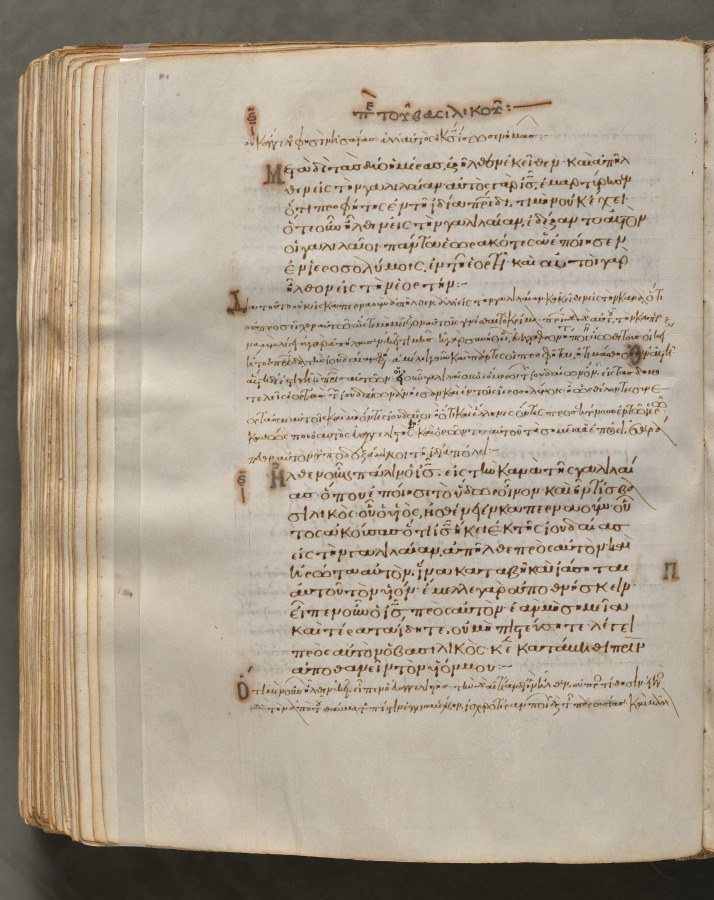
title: Text, folio 341 (verso), from a Gospel Book with Commentaries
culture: Byzantium, Constantinople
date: c. 1000–1100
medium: ink, tempera, and gold on vellum; leather binding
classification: Bound Volume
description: Each of the four gospels in this book opens on a page with brilliantly illuminated borders depicting the author of the text as well as birds—principally peacocks, symbols of the immortality of the soul—and fountains, representing the fountain of life and the salvation of the soul. This volume consists of 428 leaves with texts in Greek. Its level of sophistication suggests that it was probably written and decorated in a monastery in Constantinople.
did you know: Gospel books were carried in procession through Byzantine churches.